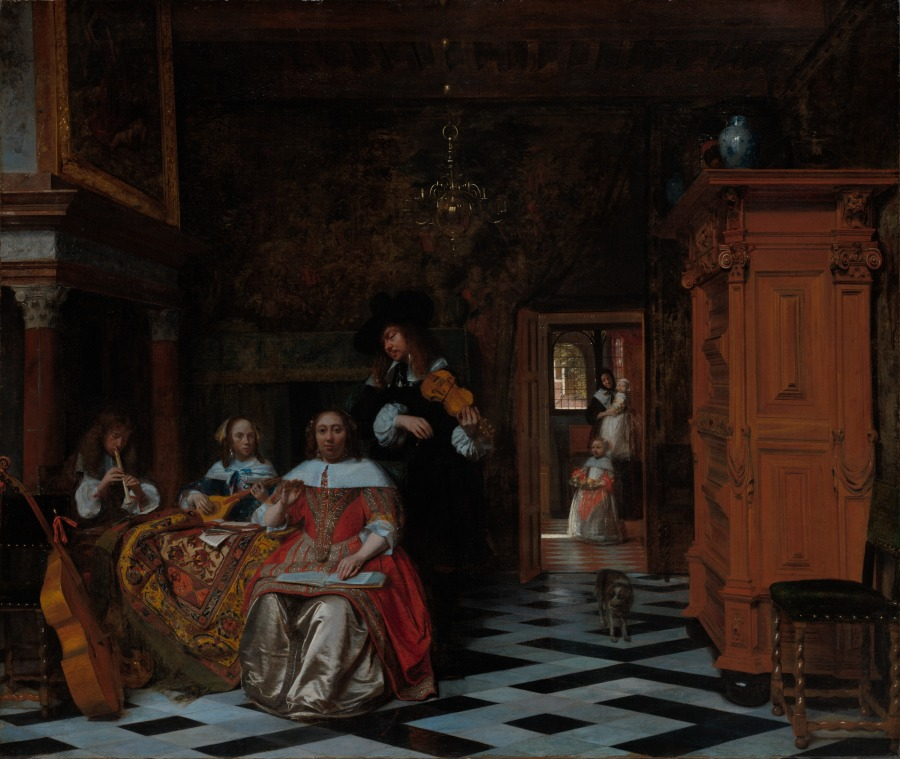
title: Portrait of a Family Playing Music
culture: Netherlands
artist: Pieter de Hooch (Dutch, 1629–1684)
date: 1663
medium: oil on canvas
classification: Painting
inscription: Signed lower left: "P D HOOCH/ 63"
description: The identity of the sitters remains unknown, although the marble floor and mantelpiece, the Transylvanian prayer rug on the table, and the silk clothes all point to the family’s considerable wealth. Furthermore, the richly carved chest at the right supports Chinese vases and Japanese lacquered boxes, a reference to the flourishing Dutch trade with Asia. Music making often took place at home, and its appearance here also signifies the harmoniousness of the family.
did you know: During this period, the Dutch Republic was the richest, most urbanized nation.